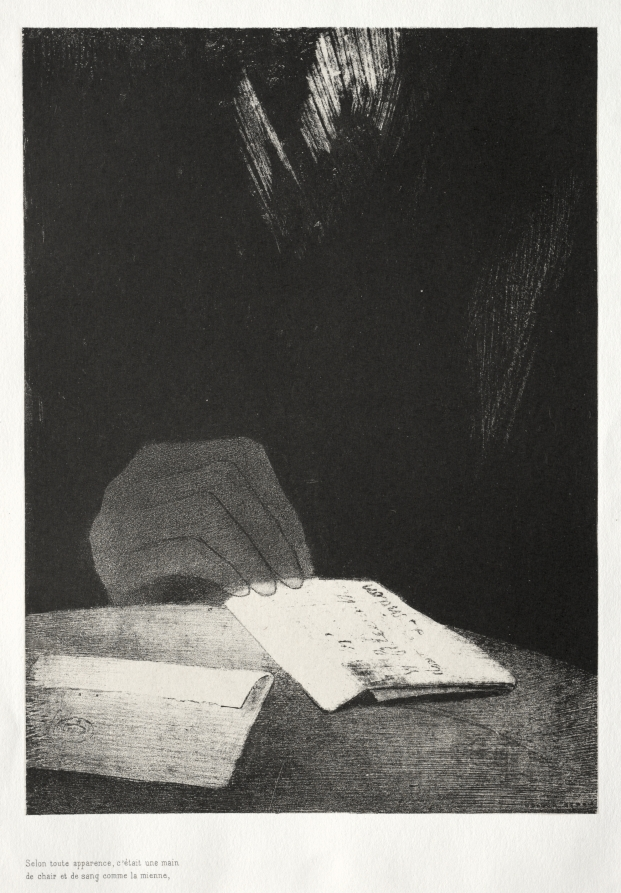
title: To All Appearances, It Was a Hand of Flesh and Blood Just Like My Own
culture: France, late 19th Century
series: The Haunted House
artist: Odilon Redon (French, 1840–1916)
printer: Auguste Clot (French, 1858–1936)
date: 1896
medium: lithograph on China paper laid on wove paper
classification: Print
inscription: printed at lower left, below image: Selon toute apparence, c'était une main / de chair et de sang comme la mienne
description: Odilon Redon was a voracious reader of contemporary literature, and such texts often influenced his art. This series was inspired by The Haunted and the Haunters, an 1859 novel by British writer Edward Bulwer-Lytton. Redon’s prints capture the book’s mysterious tone and emphasis on the supernatural through vague but evocative imagery that sometimes borders on abstraction. By this time a seasoned expert in lithography, the artist collaborated with master printer Auguste Clot. Their combined technical skills allowed for the rich tonal variation seen here, made by turning Redon’s lithographic crayon on its side, layering various marks, and even scratching directly into the surface of his stone.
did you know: One of Redon's greatest patrons, the occultist René Philipon, commissioned this portfolio as a supplement for his French translation of Bulwer-Lytton's The Haunted and the Haunters.